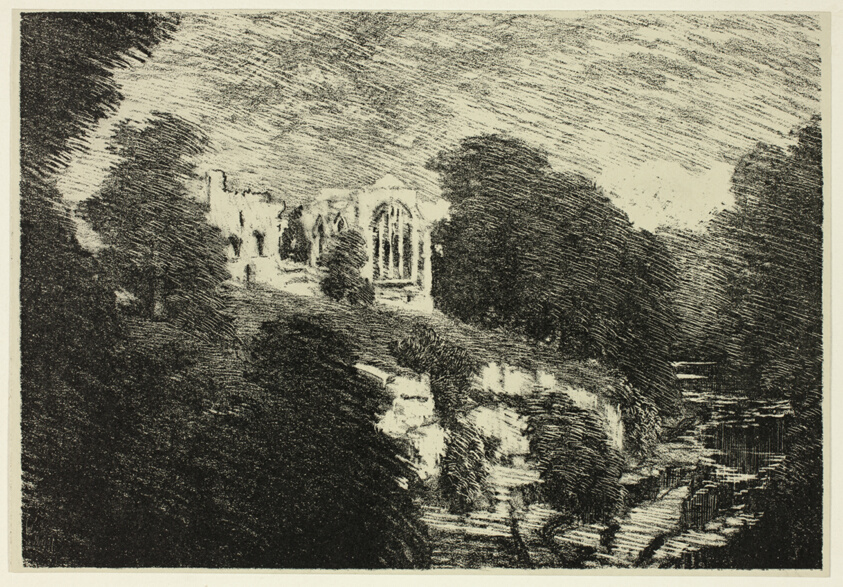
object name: Print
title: Egglestone Abbey, from the River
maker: Joseph Pennell (American, 1857-1926)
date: 1899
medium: Lithograph on ivory wove paper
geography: United States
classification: lithograph; print; prints and drawing